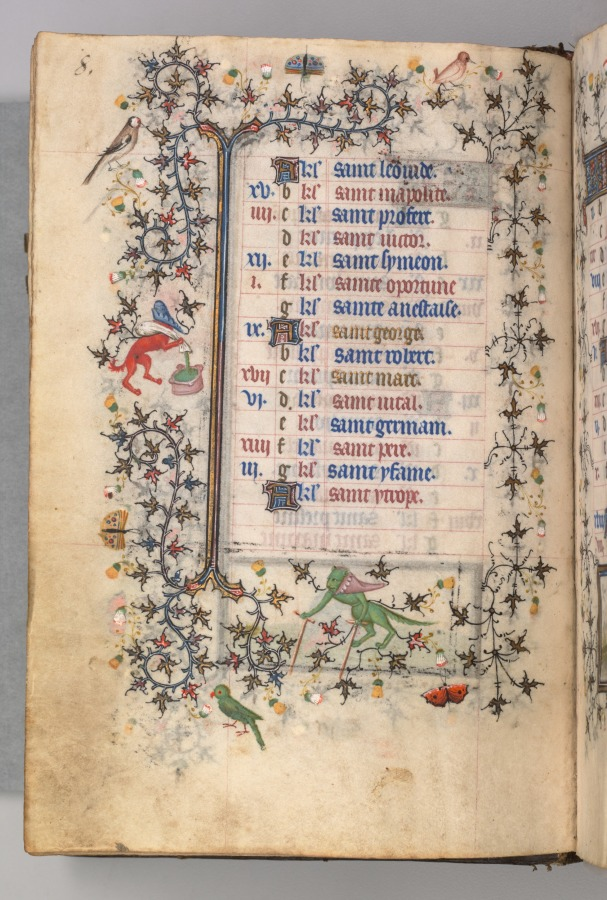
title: Hours of Charles the Noble, King of Navarre (1361-1425): fol. 4v, April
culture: France, Paris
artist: Master of the Brussels Initials and Associates (French)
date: c. 1405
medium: ink, tempera, and gold on vellum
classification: Bound Volume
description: This precious volume was obviously highly prized by its owner, the French-born King of Navarre, who had his coat of arms painted on no less than twenty folios. Rather than directly commissioning this manuscript from a specific workshop, it seems that Charles the Noble acquired his book of hours -- perhaps ready-made for the luxury market -- while on a trip to Paris in 1404-05. A collaborative effort, six painting styles are evidenced within the pages of this codex, those of two Italians, two Frenchmen, and two Netherlanders. The painter who was responsible for the planning and decoration of the book, and who produced seventeen of the large miniatures, was a Bolognese artist known as the Master of the Brussels Initials. His principal assistant, responsible for most of the borders, was a Florentine who signed his name "Zecho" da Firenze on folio 208 verso.